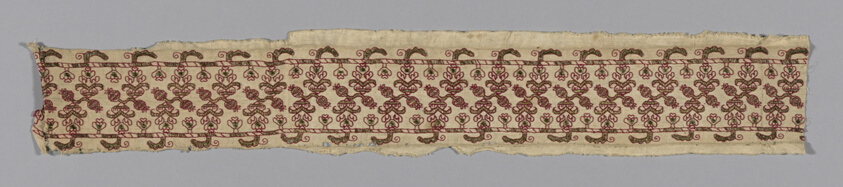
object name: Textile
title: Border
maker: Italy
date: 17th century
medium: Linen, plain weave; embroidered with silk floss and gold gilt strip wound around a silk fiber core in back, individual satin, and satin stitches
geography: Italy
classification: textile; needlework (visual works)